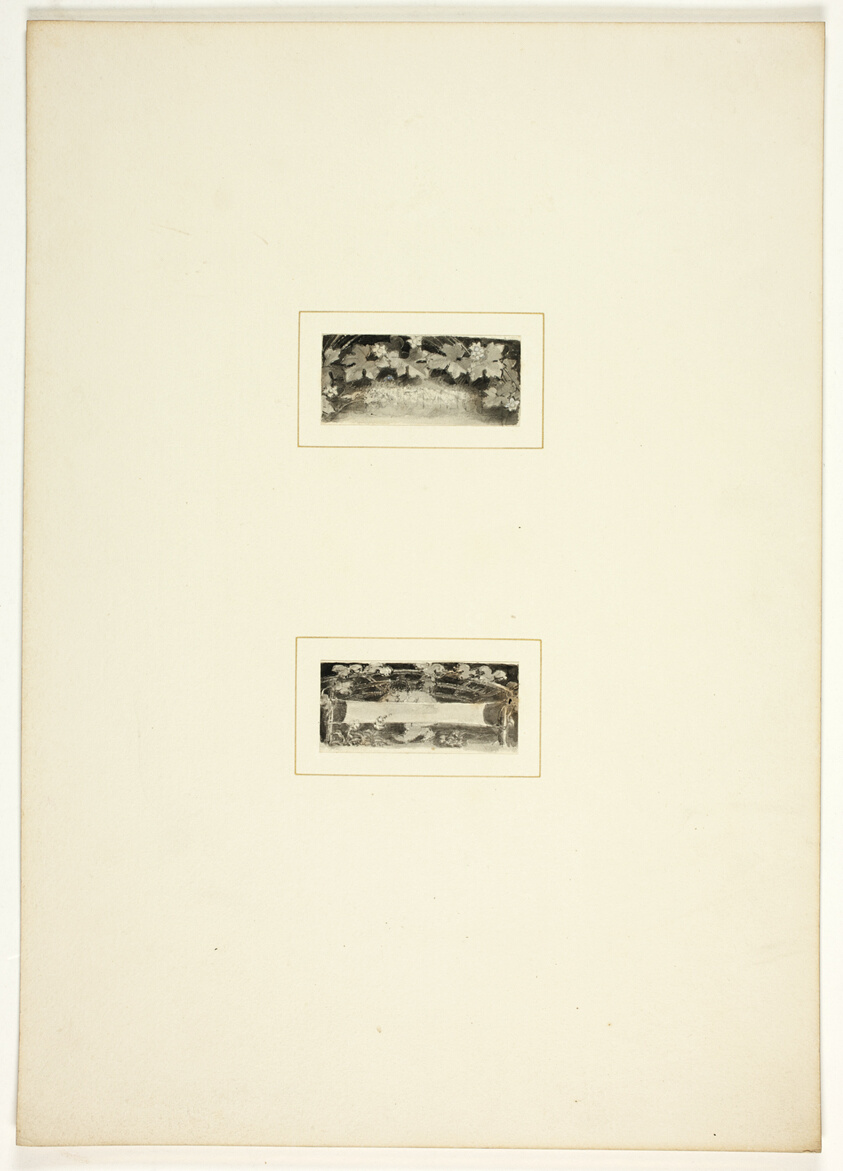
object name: Drawing and Watercolor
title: Study for a plate from Telemachus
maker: Thomas Stothard (English, 1755-1834)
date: c. 1797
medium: Ink wash on paper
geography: England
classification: ink and wash; prints and drawing; paper; drawings (visual works)